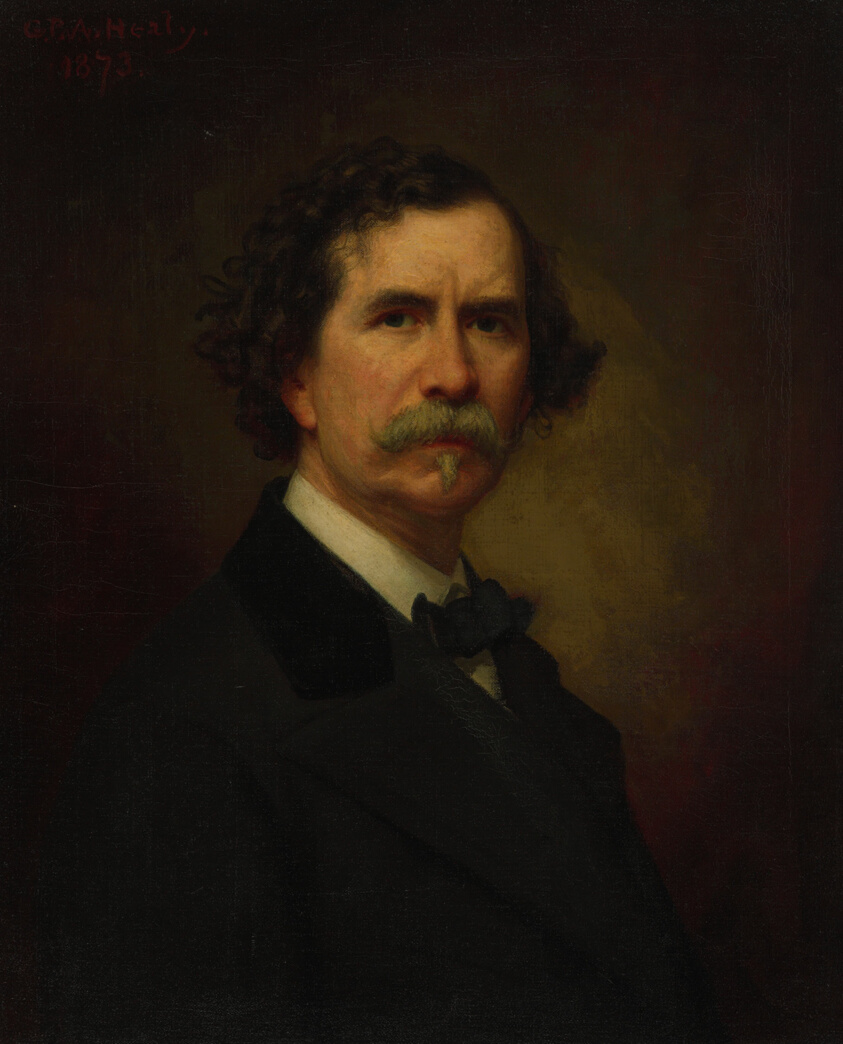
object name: Painting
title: Self-Portrait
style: Realism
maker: George Peter Alexander Healy (American, 1813–1894)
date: 1873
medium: Oil on canvas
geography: United States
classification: painting; american arts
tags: Chicago